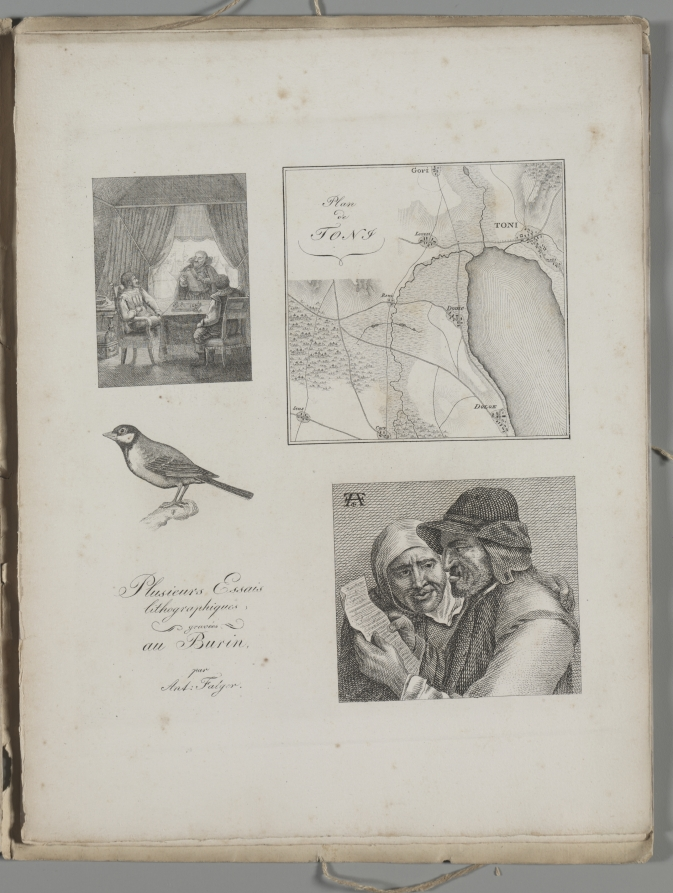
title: Art of the Lithograph: Four Engraving Samples, War Tent, Map of Toni, Bird, Dutch Farmer and Woman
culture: Germany, 19th century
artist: Alois Senefelder (German, 1771–1834)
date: 1819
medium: lithograph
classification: Portfolio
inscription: On plate, lower left: Plusieurs Essais / lithographiques. / gravée / au Burin / par / Ant: Falger.